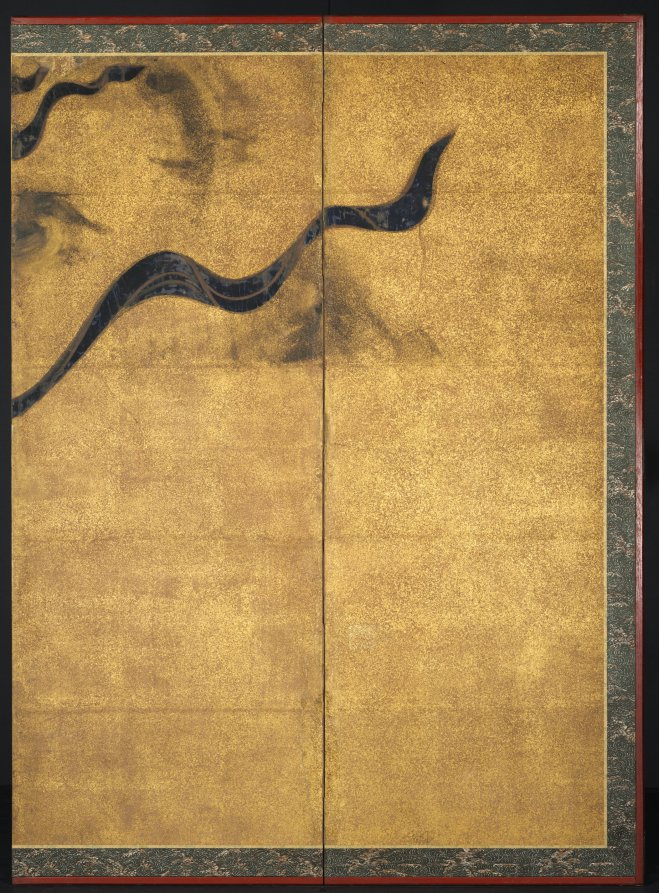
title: God of Thunder (Raijin)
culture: Japan, Edo period (1615–1868)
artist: studio of Tawaraya Sōtatsu (Japanese, c. 1570–c. 1640)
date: mid-1600s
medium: six-panel folding screen; ink, color, and gold on paper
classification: Painting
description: Such depictions of the God of Thunder originated in Buddhist art. Here, the image was painted on paper covered with gold dust, a technique often found in paintings by Tawaraya Sotatsu or of the Sotatsu school. This gold technique and the "Inen" seal here suggest that the anonymous painter of this screen was probably associated with the Sotatsu workshop. The artist used a prototype borrowed from earlier Japanese narrative painting—rather than mechanically reproducing Sotatsu’s image—and created a bold, innovative image that served the world of play and leisure in early Edo Japan. The theme of "God of Thunder" was often paired with "God of Wind" and has been frequently reinterpreted by generations of Rimpa artists. Unfortunately, the screen God of Wind which would have accompanied this God of Thunder cannot be located.